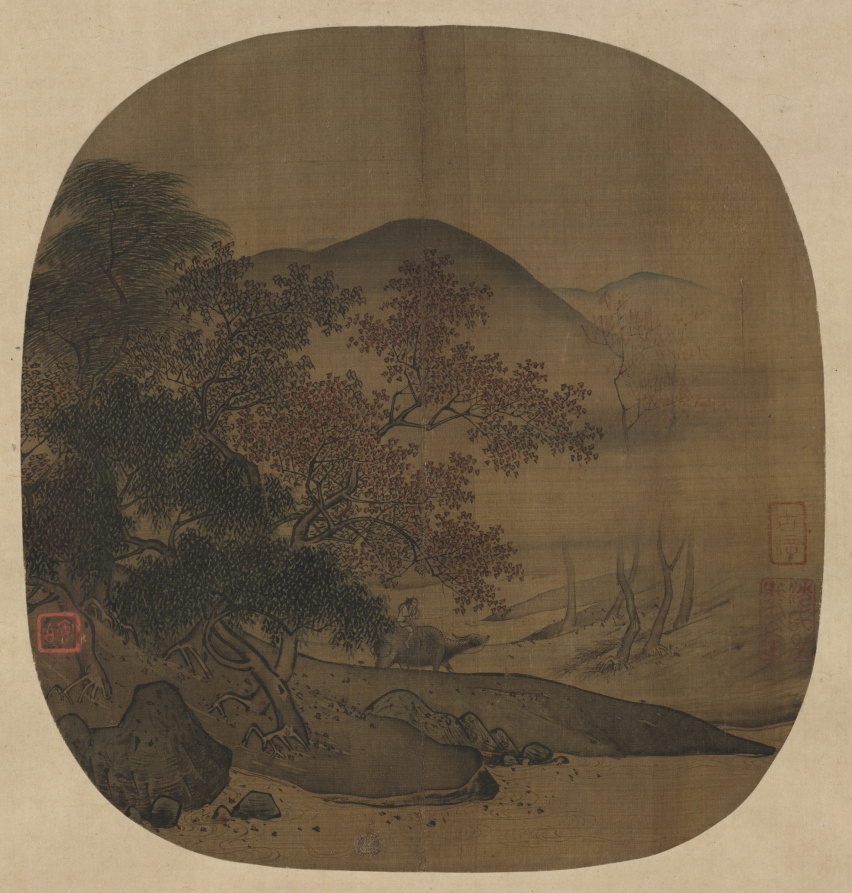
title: Buffalo and Boy in Autumnal Landscape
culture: China, Southern Song dynasty (1127-1279)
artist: Yan Ciping (Chinese, active 1164–1187)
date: 1127–1279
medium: album leaf; ink and light color on silk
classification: Painting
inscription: 5 seals: 3 unidentified; 2 indecipherable.